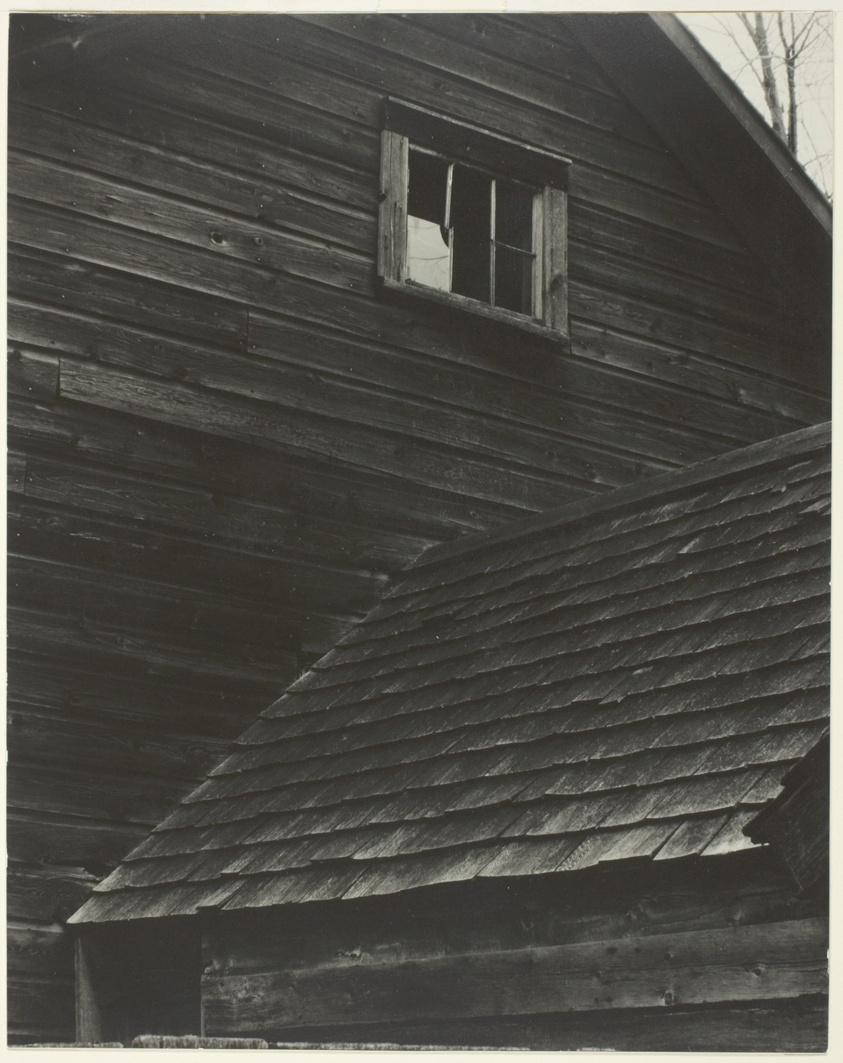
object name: Photograph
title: Barn—Lake George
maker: Alfred Stieglitz (American, 1864–1946)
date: 1922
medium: Gelatin silver print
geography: United States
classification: gelatin silver (developing-out-paper) pr; photographic process; photography; photograph